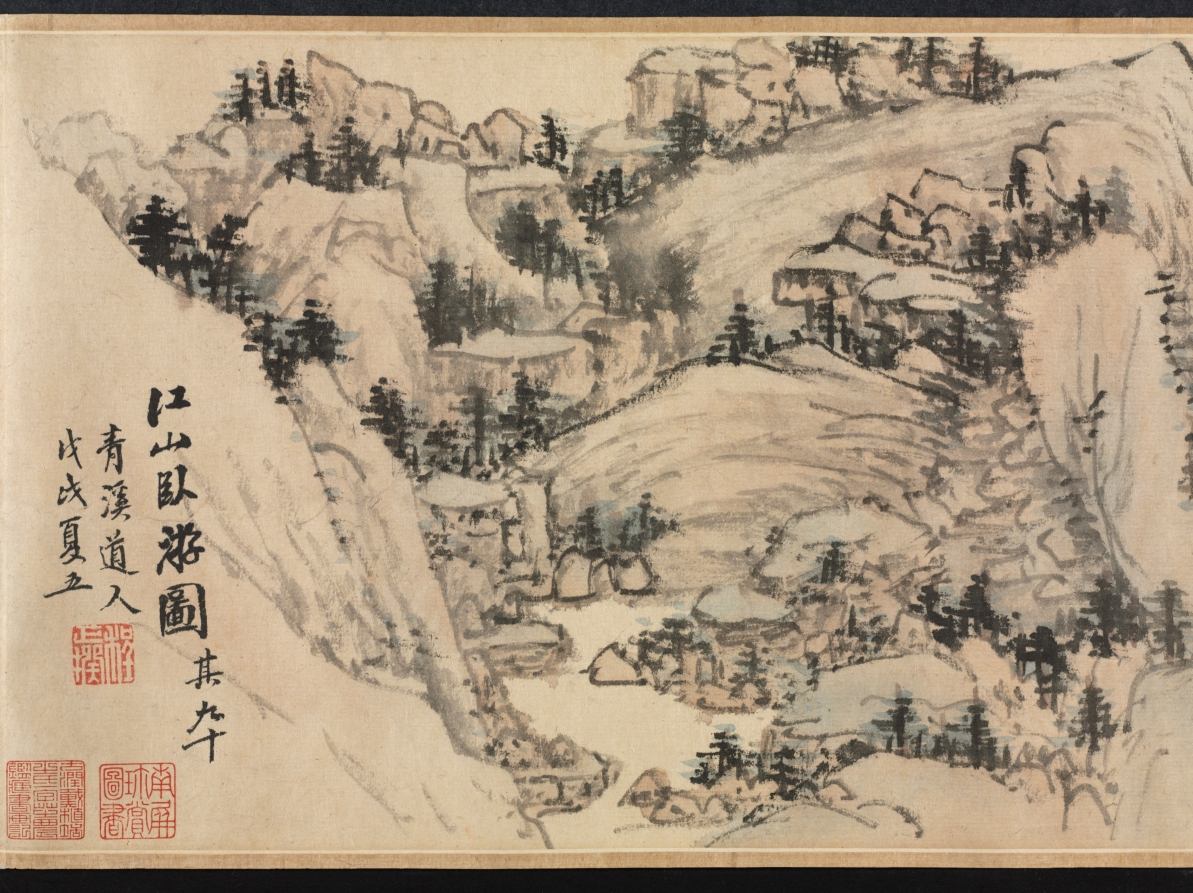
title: Dream Journey among Rivers and Mountains, no. 90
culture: China, Qing dynasty (1644-1911)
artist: Cheng Zhengkui (Chinese, 1604–1676)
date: 1658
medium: Handscroll; ink and color on paper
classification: Painting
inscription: 江山臥遊圖其九十, 青溪道人, 戊戌夏五。 [印] 程正揆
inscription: Title and inscription by Huang Yi 黃易 (1744–1802), and 3 seals.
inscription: 1 colophon and 9 additional seals: 3 seals of Dai Zhi 戴植 (active about 1821–1850); 1 colophon, dated 1914, and 3 seals of Yan Shiqing 顏世清 (1873–1929); 3 seals of Wang Nanping 王南屏 (1924–1985).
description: Cliffs and waterfalls interspersed with trees and dotted vegetation are spread over this handscroll. Long paths wind their way through villages, beside cottages, shrines, and over bridges. In the past, Chinese literati officials liked to take a “dream journey” along mountains and rivers when viewing landscape paintings in their studios. Scenery of this kind thus became a way to escape from the world of bureaucracy and administration. The painter Cheng Zhengkui used the title “Dream Journey” for a whole series of paintings, of which this is number 90. He is said to have painted 500 of them, but the actual count remains unknown.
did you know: Cheng Zhengkui planned to make 100 dream journey paintings but may have ultimately made 500.